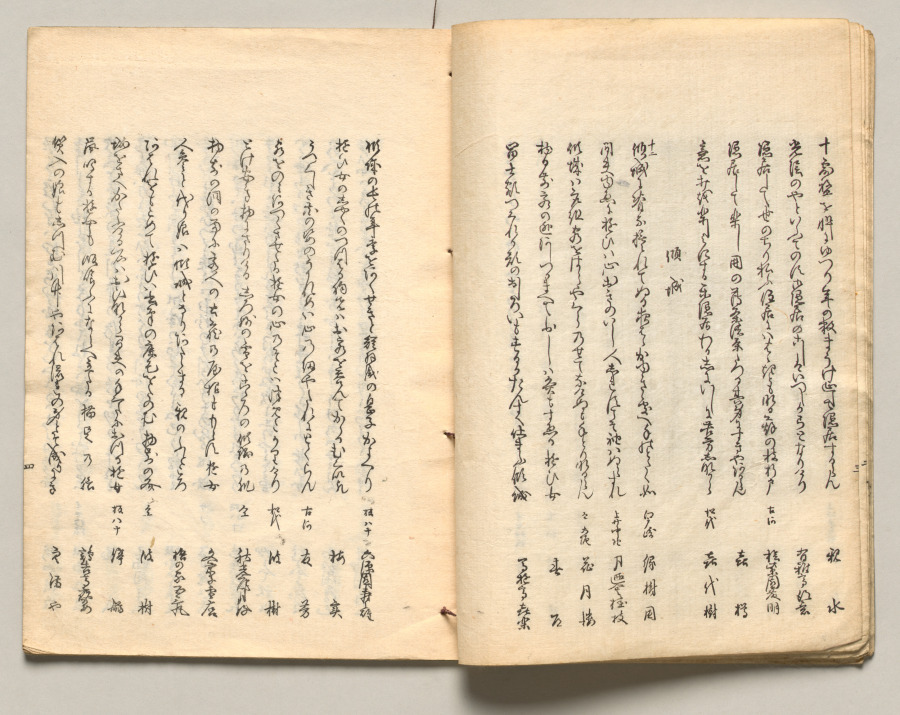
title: Spread Twelve from Volume Four of People of Japan in Light Verse (Kyōka)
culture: Japan, Edo period (1615–1868)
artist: Utagawa Hiroshige (Japanese, 1797–1858)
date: 1857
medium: Woodblock-printed book; ink and color on paper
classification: Bound Volume